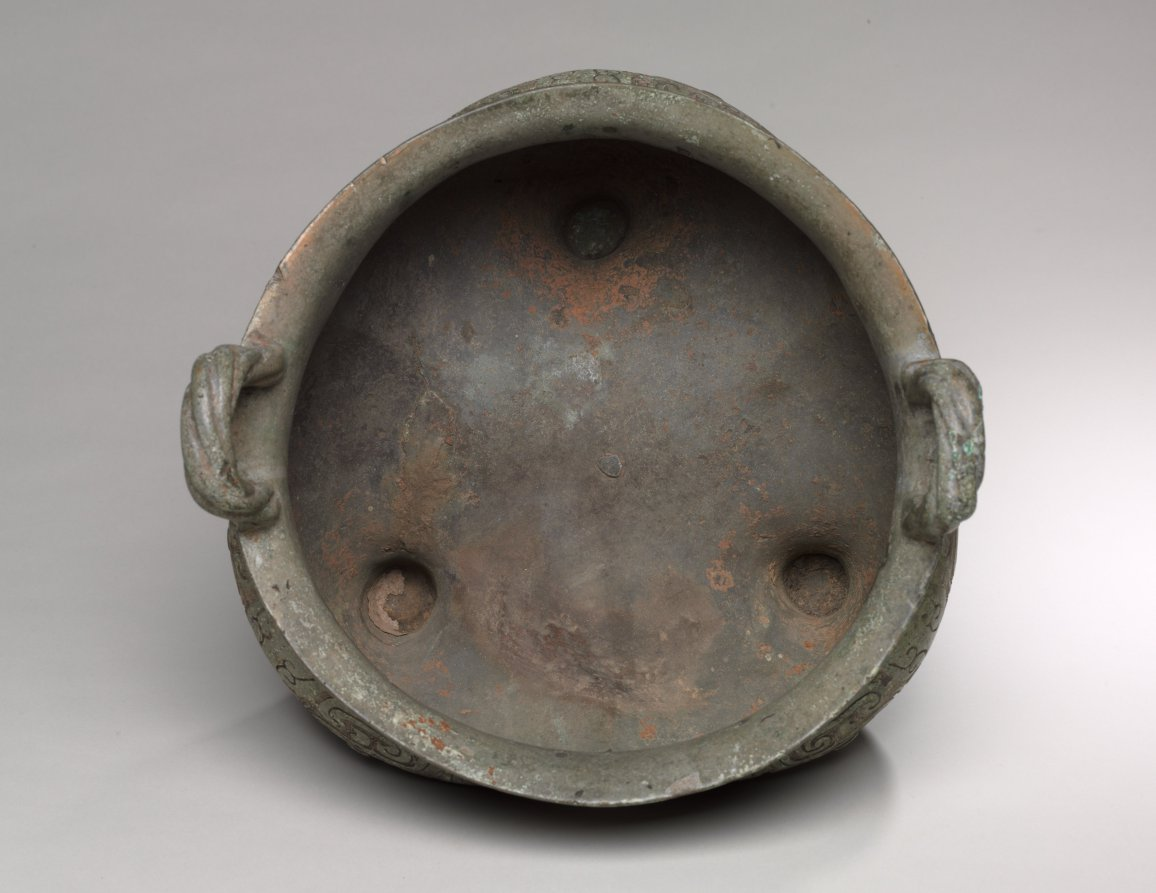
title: Hollow-Legged Tripod (Li Ding)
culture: China, Shaanxi province, Xi'an, Western Zhou dynasty (c. 1046–771 BCE)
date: late 900 BCE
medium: bronze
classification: Metalwork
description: This food vessel exhibits a new decorative trend of metropolitan Western Zhou foundries. Zoomorphic images became increasingly abstract and subject to linear elaboration. The dominating animal mask (taotie) of the Shang is here transformed, dissolved, and dissected into intricate patterns of curving bands and median grooves. The design is abstract but not devoid of symbolic contents and functions. A smooth and even gray-green patina--the result of natural corrosion during burial--covers the outside and creates a new visual impact on the surface decoration.